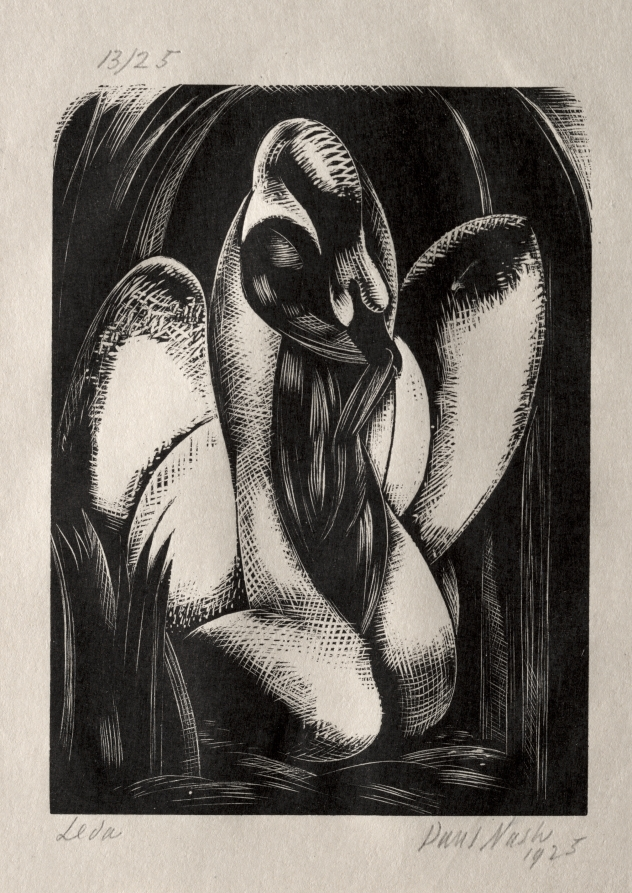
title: Leda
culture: England, 20th century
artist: Paul Nash (British, 1889–1946)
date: 1925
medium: wood engraving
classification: Print